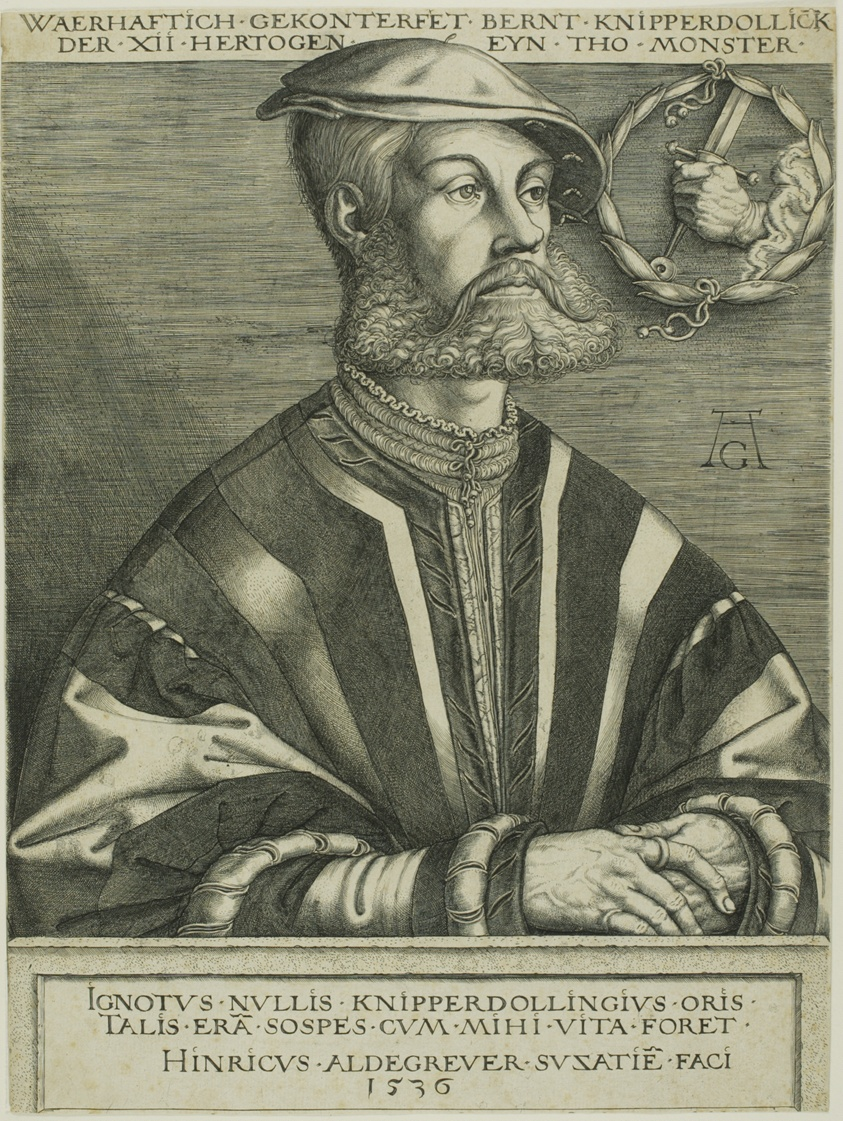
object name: Print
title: Bernard Knipperdolling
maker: Heinrich Aldegrever (German, 1502-c.1560)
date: 1536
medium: Engraving in black on ivory laid paper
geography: Germany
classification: engraving; print; prints and drawing